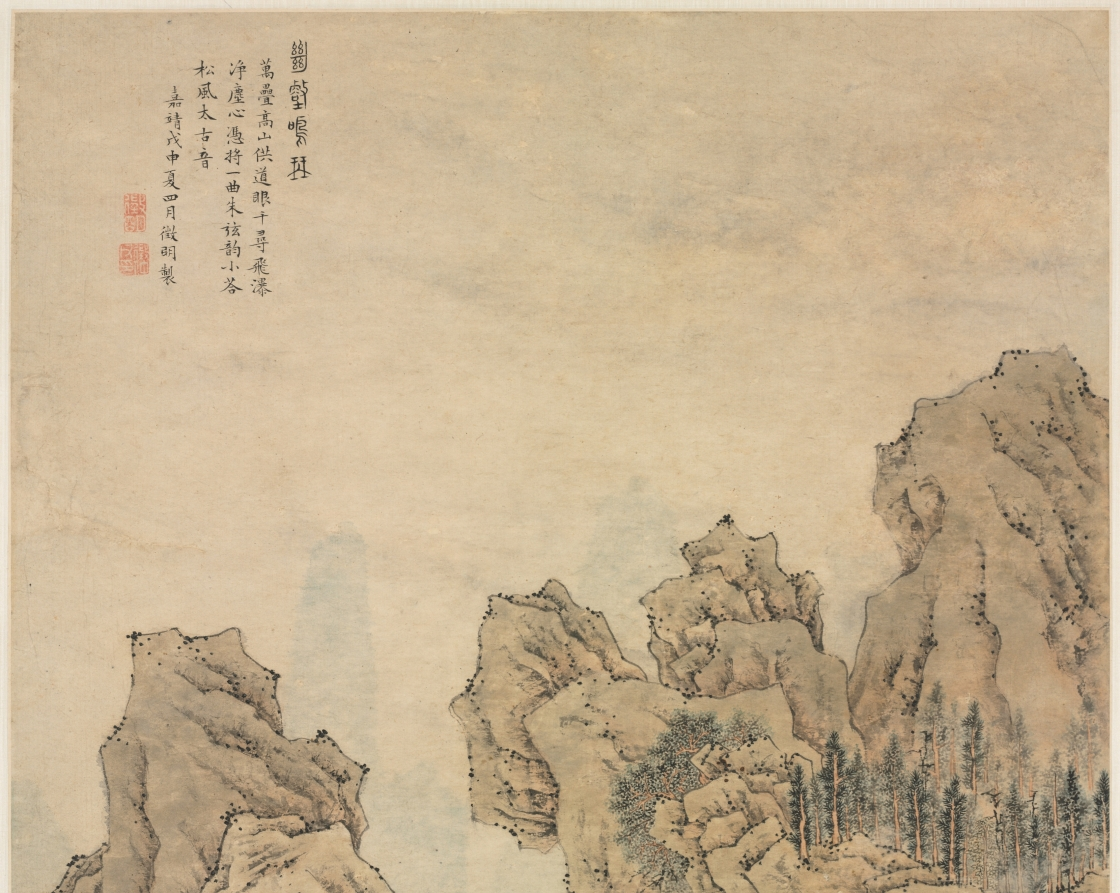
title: Playing the Qin in a Secluded Valley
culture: China, Ming dynasty (1368–1644)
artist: imitator of Wen Zhengming (Chinese, 1470–1559)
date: 1548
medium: hanging scroll; ink and light color on paper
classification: Painting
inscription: 幽壑鳴琴。 萬疊高山供道眼，千尋飛瀑淨塵心。 憑將一曲朱絃琴，小答松風太古音。 嘉慶戊申夏四月徵明製 [印] 徵明; 徵仲父印 [右下方] 悟言室印; 衡山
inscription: 4 additional seals: 3 of Cheng Qi 程琦 (1911–1988); 1 unidentified.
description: The poem inscribed in this painting reads: "Ten thousand layered lofty mountains are presented to the cultivated eye, A thousand feet of cascading falls cleanse the dusty heart. May the harmonies of my red-stringed tune Be the humble answer to the pine wind's ancient song." Different versions of this painting exist. Scholars have suggested that the solid renderings of the rock masses and the volumetric mountain configurations as seen here appear more characteristic of Lu Zhi 陸治 (1496–1576), Wen Zhengming's pupil.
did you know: In paintings, Chinese literati often play the instrument in a landscape setting, as the sound of the qin symbolizes harmony between man and nature.